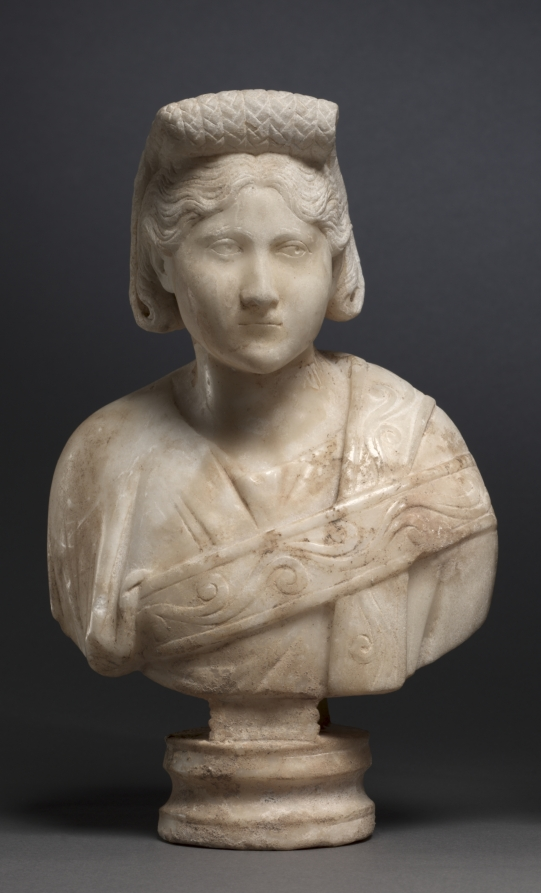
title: Portrait Bust of an Aristocratic Woman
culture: Anatolia, late Roman-early Christian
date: 280–90 CE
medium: marble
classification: Sculpture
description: These busts are thought to have been unearthed with the Good Shepherd and Jonah sculptures. The nearly identical facial characteristics of each sitter—three males and three females—suggest that the same man and woman was represented three times. Although the intended function of the busts remains unknown, they probably represent a husband and wife. The portraits have been dated stylistically, as well as by costume and hairstyle, to the AD 270s. One of the men wears a paludamentum, or fringed cloak. One of the women wears a decorative stole, an attribute of rank probably conferred on her by her husband. The most distinctive feature of the female portraits is the hairstyle, a variation of the scheitzelkopf, in which the hair, after being combed behind the ears down to the nape of the neck, is braided, pulled up over the top of the head and folded under at the front. Careful study of the evolution of women's coiffures supports a date of AD 270 to 280 for the portraits, about the same as the symbolic sculptures of Jonah and the Good Shepherd. The rarity of intentionally paired portrait busts in late antiquity, especially those in a series, raises questions as to their original function. The busts may have been commemorative and intended for distribution as diplomatic gifts. It is likely that they were commissioned by a single, important patron or family to enhance their social or political status.